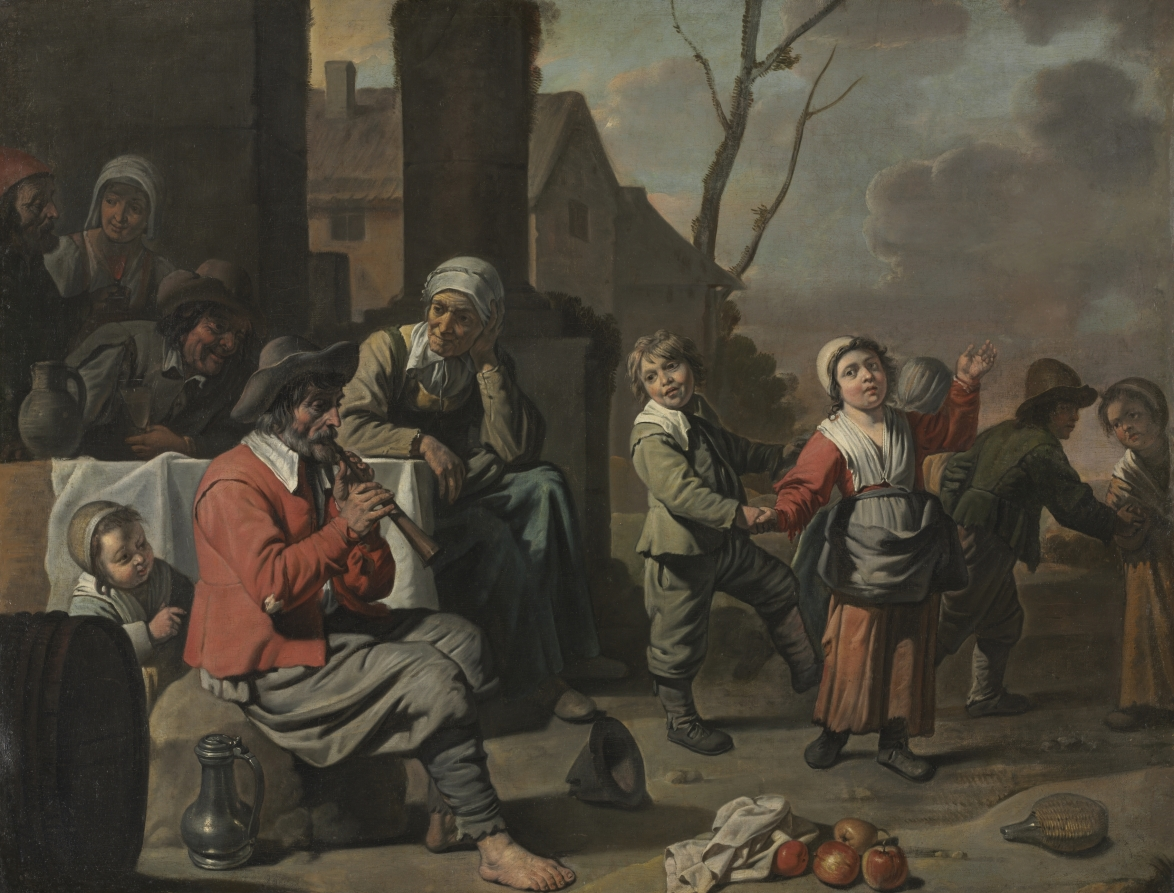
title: Peasant Children Dancing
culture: France, 17th century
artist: circle of Le Nain (French)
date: 1650s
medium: oil on canvas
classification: Painting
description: This scene of outdoor, rustic frivolity was probably painted by the Master of the Béguins, a Flemish imitator of the Le Nain brothers who capitalized on their success around the 1650s in Paris. Distinct features of this artist's style are the wide eyes, pudgy cheeks, and white peasant caps—béguins—that give the artist his name. The sturdy and comical peasants, clothed in coarse fabrics with heavy folds, and the use of earthen tones emphasize the provincial mood. During the mid-17th century, the treatment of the poor and lower classes was a subject of great debate in the Catholic Church in Paris, especially at Saint Sulpice, where the Le Nain brothers were buried. Scenes of everyday workers or peasants were incredibly popular, drawing on both comic, Flemish genre scenes of drinking and the French interest in carefully observed, realistic details. Although the picture's meaning remains ambiguous, the gaiety of this world comes from the wonderfully naturalistic details, such as the worn hole on the piper's elbow, the villagers' cheerful expressions, and still-life details such as the ripe apples and reflective drinking vessel.